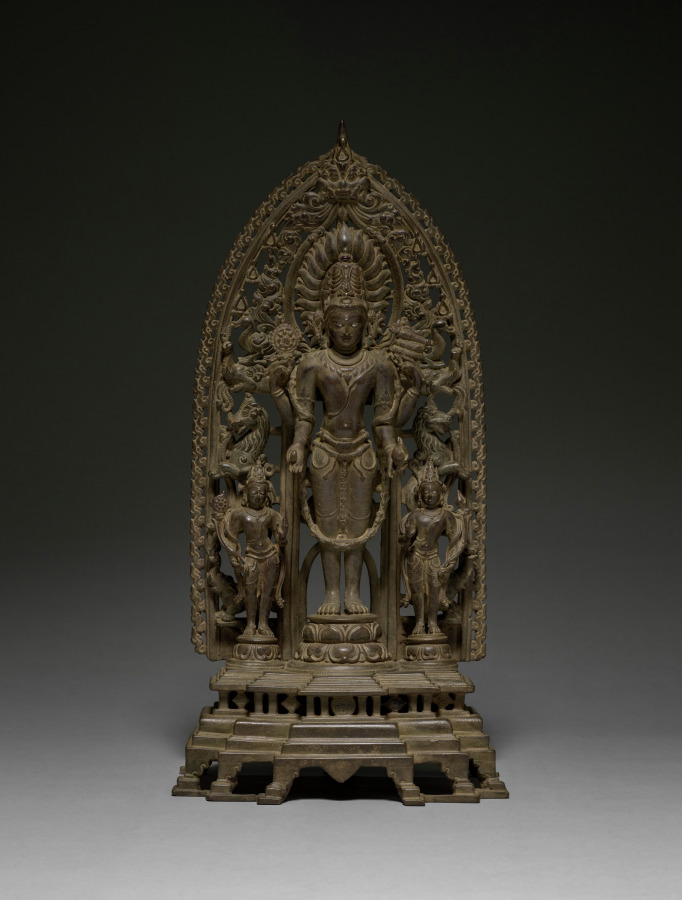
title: Vishnu Attended by Chakrapurusa and Shankhapurusa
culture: East India, Bengal, Pala period, 11th-12th century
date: 1000s–1100s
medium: bronze with silver inlay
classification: Sculpture